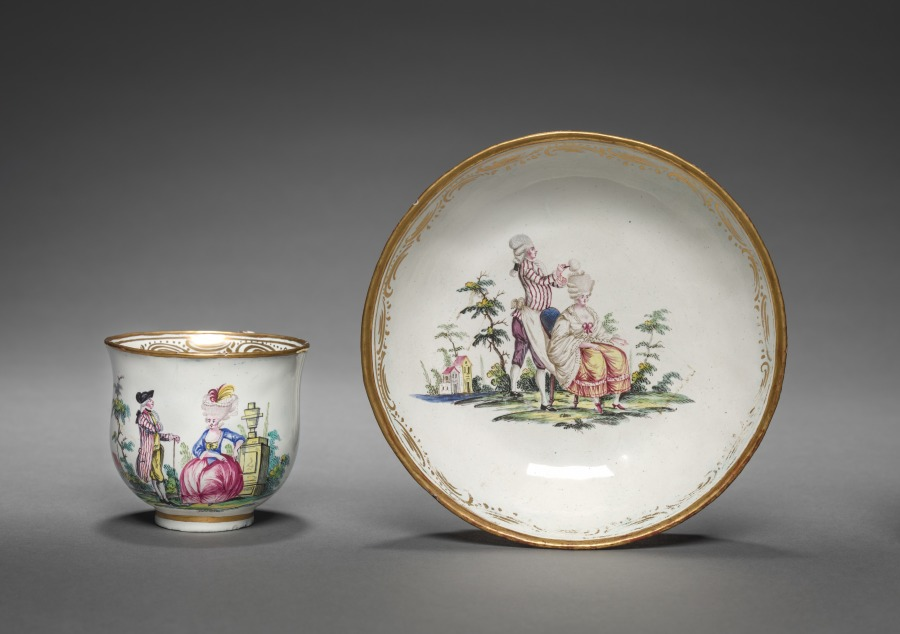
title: Cup and Saucer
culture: England, mid-18th Century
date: mid-1700s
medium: enamel on metal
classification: Enamel